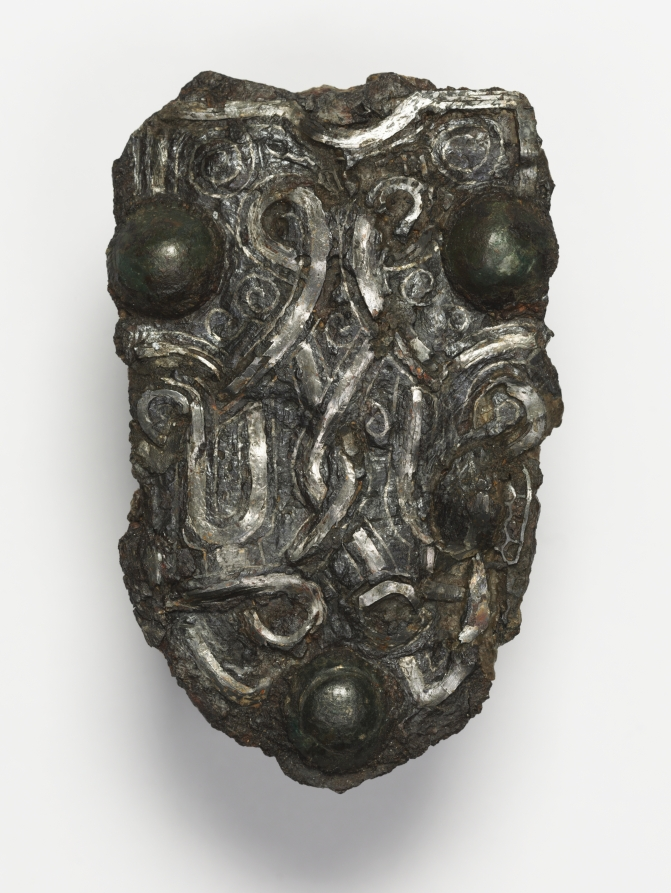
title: Tab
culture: Frankish, Migration period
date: 600s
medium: iron with silver overlay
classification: Jewelry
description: This tab would have been attached to a strip of leather worn around the waist. It was likely both an ornamental statement indicating social rank and a practical accessory. The decorative inlay was applied by forcing silver wire into a pattern engraved into the iron. The condition of the tab indicates that it was likely excavated, perhaps from a grave.